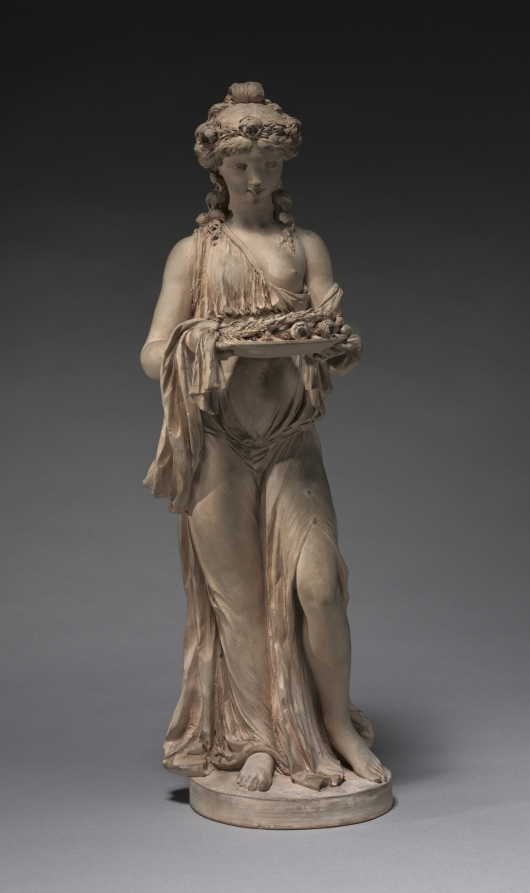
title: Young Girl Carrying a Garland of Roses on a Platter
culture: France, 18th century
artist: Clodion (French, 1738–1814)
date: early 1770s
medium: terracotta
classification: Sculpture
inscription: signed near base: CLODION.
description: Claude Michel, generally referred to as Clodion, is best known for his decorative terra-cotta statuettes. This work is quite representative of Clodion in both subject and style. The sculpture, which is developed upon works dating from the artist's earlier residency in Rome, represents a standing female figure carrying an abundant display of flora. The figure alludes to Greek and Roman depictions of the horae, or goddesses of the seasons, and, through the figure's floral crown and platter, can easily be attributed to the season of spring.